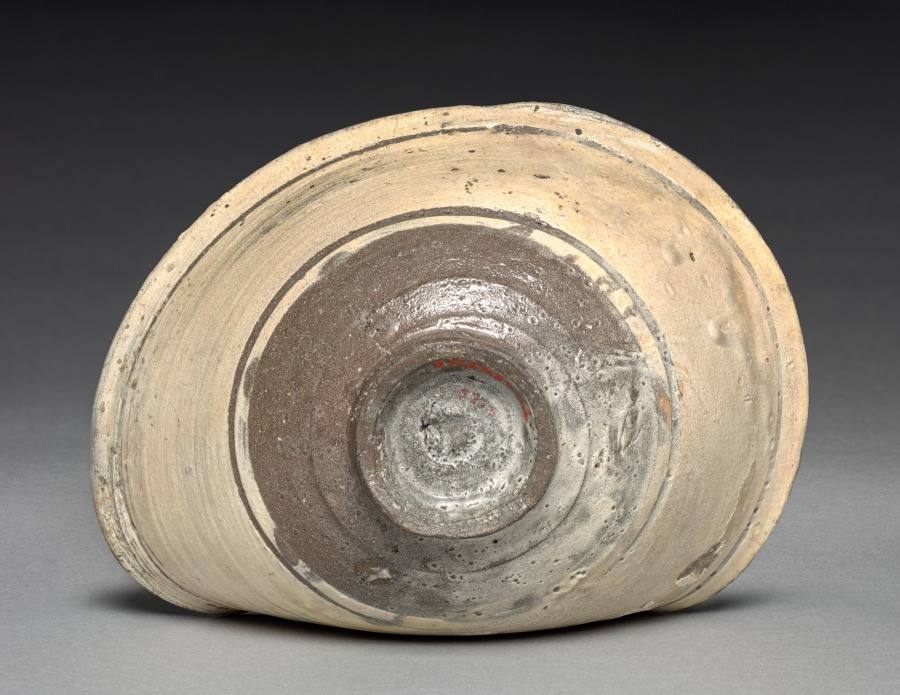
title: Bowl with Brushing Decorations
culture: Korea, Joseon dynasty (1392–1910)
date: 1400s–1500s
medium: Clay, glaze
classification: Ceramic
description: This type of wide-mouthed bowl was used everyday in Korea, not exclusively for tea drinking. But when it was introduced to Japan around the early 1500s, its imperfect appearance evoking the aesthetics of wabi-sabi caused it to be repurposed as a tea bowl. Korean tea bowls were circulated as an item of foreign luxury among Japanese military elites. Many Korean potters were abducted to Japan during the Japanese invasions (1592–98) and some settled down in provinces such as in the Saga prefecture in Kyushu. Dislocated Korean potters are often credited for their leading role in the development of ceramic industry in Japan.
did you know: This type of humble tea bowl was highly praised among Japanese collectors for its imperfect beauty.